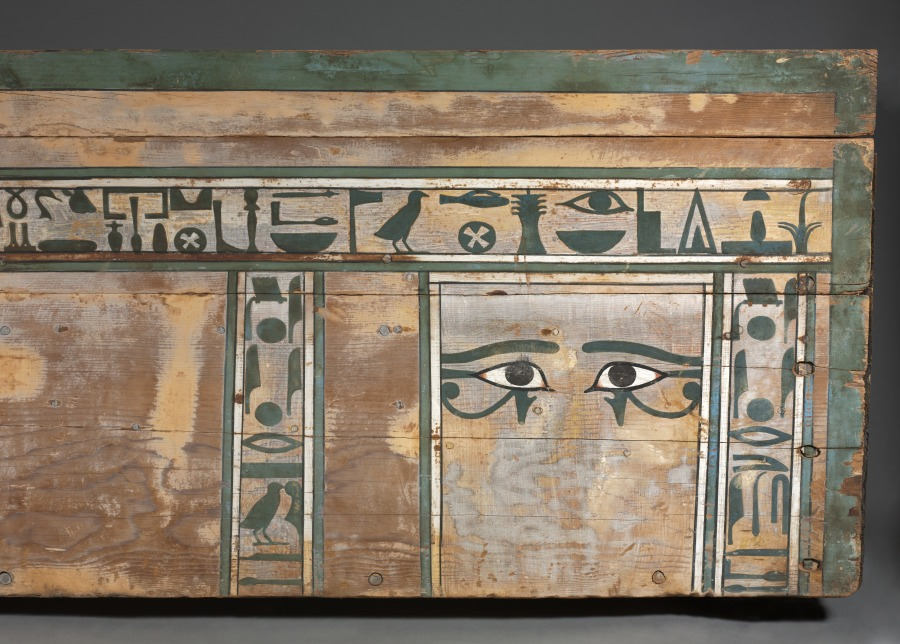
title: Coffin of Senbi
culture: Egypt, Meir, Middle Kingdom, mid-Dynasty 12, reign of Amenemhat II to Sesostris III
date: c. 1918–1859 BCE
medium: gessoed and painted cedar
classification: Funerary Equipment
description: The most common type of coffin during the Middle Kingdom took the shape of a rectangular box with lid. The mummy inside was placed on his left side, facing east, his head behind the two magical eyes. These—in the shape of human eyes, to which have been added the markings of a falcon's head—were supposed to enable him to behold the rising sun, reborn daily. The long horizontal inscriptions are prayers to Anubis (god of embalming) and Osiris (god of the dead) for offerings of food and drink and other items necessary for survival in the afterlife. The short vertical inscriptions place him under the protection of the gods of earth, sky, air, and moisture, as well as various funerary deities.